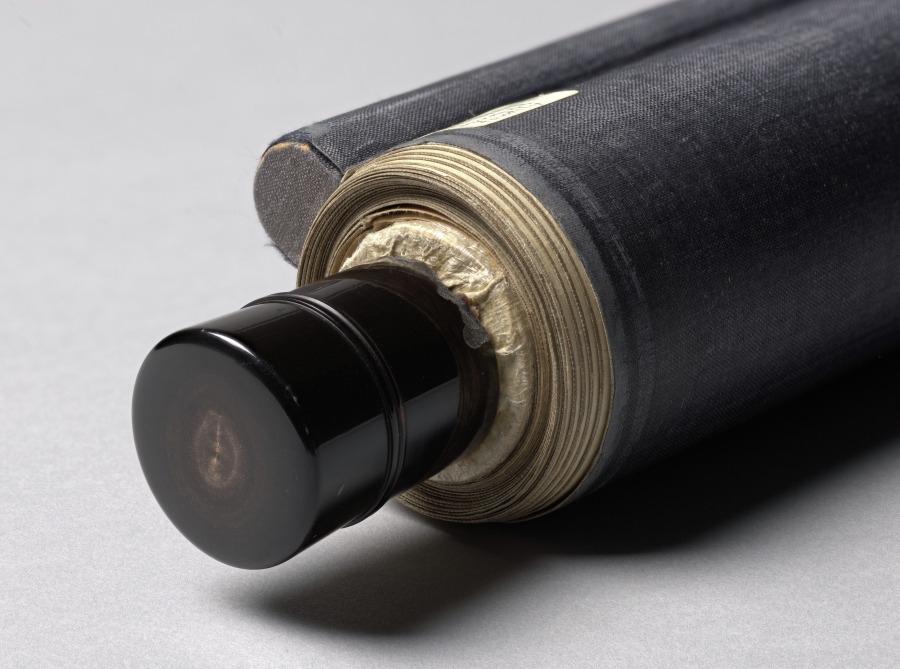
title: Xu Jingyang Moving His Family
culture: China, Ming dynasty (1368–1644)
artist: Cui Zizhong (Chinese, 1574–1644)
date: 1644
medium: Hanging scroll; ink and color on silk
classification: Painting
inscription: Artist's 2 seals: Pei-hai, Cui Zizhong yin.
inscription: 9 additional seals: 2 of Xiang Yuan (18th-19th c.); 1 of Tang Zuomei (late 18th-19th c.); 1 of Zhang Heng 張珩 (1915-1963); 1 of C. C. Wang 王季遷 (1907–2003); 4 unidentified.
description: Xu Jingyang was a dedicated fourth-century Confucian official who allegedly turned into a Daoist immortal. This scroll depicts the legend that when he attained immortality, he took his entire household, including chickens and dogs, to paradise. Cui Zizhong’s painting style intentionally referenced ancient masters. Typical of the pre-Song dynasty landscape tradition, there is the use of blue and green colors and an emphasis on outline rather than texture. While the trembling outlines are reminiscent of earlier painters, the flickering light on rocks and trees is a stylistic feature of Cui’s own time.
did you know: Xu Jingyang, wearing red, is in the upper register of figures, while below his servants transport a rooster, dog, and other supplies.